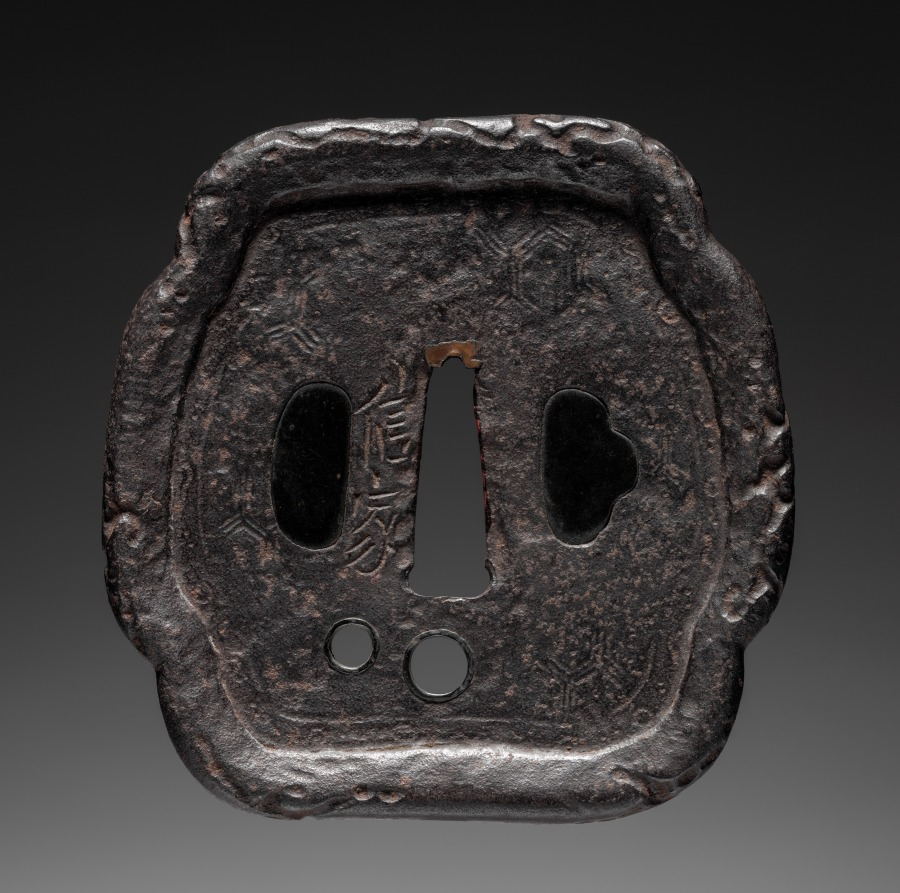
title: Sword Guard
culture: Japan, Muromachi period (1392–1573) to Momoyama period (1573–1615)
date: 1500s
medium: iron (Myochin type)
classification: Arms and Armor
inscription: signed "Nobuiye."